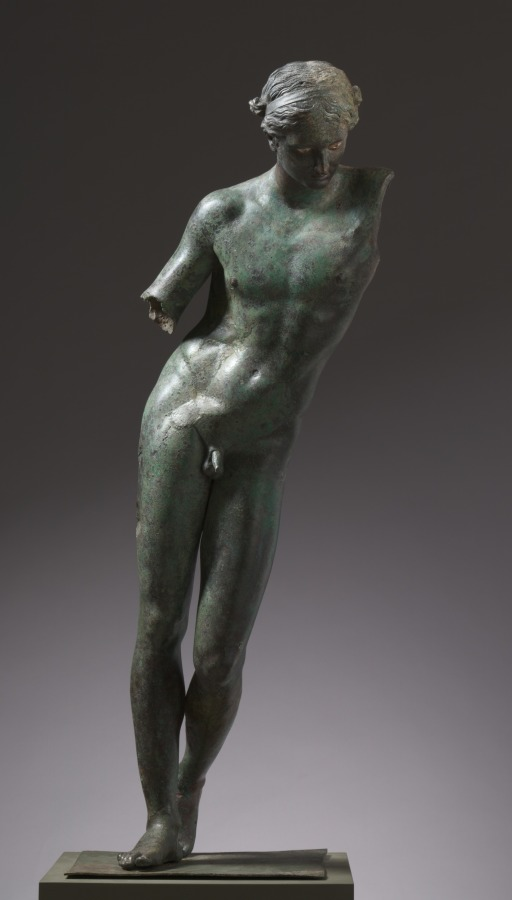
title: The Cleveland Apollo: Apollo Sauroktonos (Lizard-Slayer) or Apollo the Python-Slayer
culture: Greece, Athens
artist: attributed to Praxiteles (Greek, Athenian, c. 400–330 BCE)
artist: or Follower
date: c. 350–200 BCE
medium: bronze, copper, and stone inlay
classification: Sculpture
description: The Cleveland Apollo has been called both Lizard-Slayer (Sauroktonos) and Python-Slayer. The first name comes from the Roman author Pliny the Elder (23–79 CE), who noted in describing bronze works made by the Athenian sculptor Praxiteles (active around 370–330 BCE), “the youthful Apollo [is] known as the Sauroktonos because he is aiming an arrow at a lizard [Greek sauros] which is stealing toward him.” Scholars have long connected this description with artworks showing the young Greek god Apollo in a distinctive pose and hairstyle, standing on his right leg and leaning to his left. In more completely preserved versions, Apollo reaches toward a tree with his left arm and seems to take aim at a lizard. The Cleveland Apollo shows the adolescent god similarly posed and coiffed, making it an important addition to the Apollo Sauroktonos group—the only surviving large-scale bronze sculpture of the type. The young Greek god Apollo, identifiable by his distinctive hairstyle and pose, stands on his right leg and leans to his left, probably toward a now-lost tree. Although now separated, the left forearm and hand survive, together with an unusual lizard-like creature, perhaps drawn from the world of myth. A flat bronze base also remains, though it may be a later adaptation. A tree or other support has been lost, probably smaller than in the marble versions. Given its material and very high artistic quality—note the lifelike hair, fingernails, and inlaid copper lips and nipples—more than one scholar has suggested that the Cleveland Apollo could be the very sculpture seen by Pliny. Some have called the sculpture “Python-Slayer,” seeing the oddly shaped serpentine creature with asymmetrical legs as the mythical Python killed by Apollo in establishing his sanctuary at Delphi. But technical details may explain some of the asymmetry, and no other specific evidence connects it to Delphi. Most scholars would retain the name Sauroktonos (Lizard-Slayer) for the Cleveland Apollo, even as some debate whether it was made by Praxiteles himself or a later follower.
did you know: The Cleveland Apollo is the only surviving large-scale bronze sculpture of its type, Apollo Sauroktonos (the Lizard-Slayer).